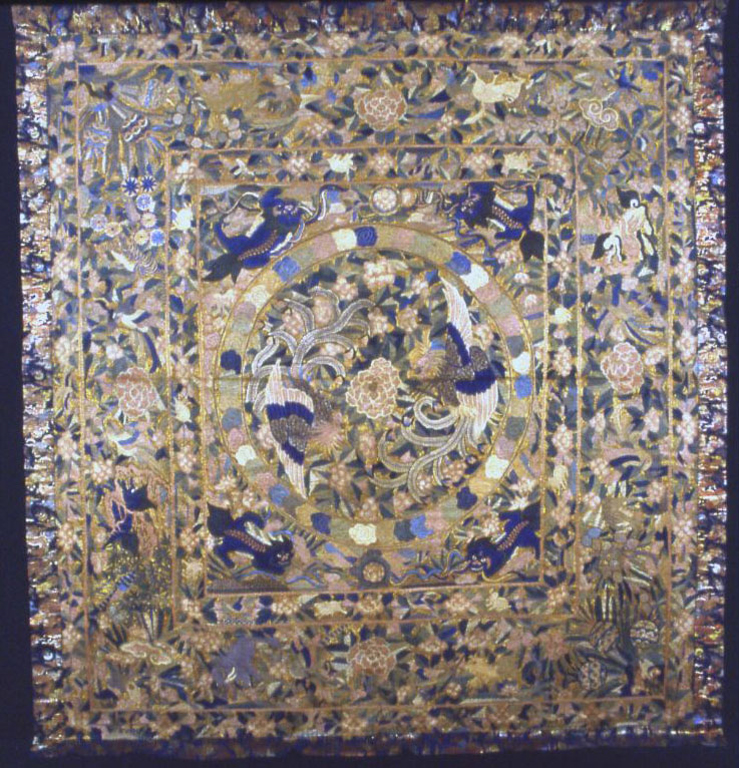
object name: Textile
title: Hanging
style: late edo, meiji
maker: Japan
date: late Edo period (1789–1868)/Meiji period (1868–1912), 1825/1900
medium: Cotton, plain weave; covered with paper; embroidered with silk, cotton and wild silk, in bullion, satin, single satin, and stem stitches; Chinese knot, laid work and couching; edged with silk and gold-leaf-over-lacquered-paper strip, warp-float faced 4:1 'z' twill interlacings of secondary binding warps and supplementary patterning wefts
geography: Japan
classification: textile; needlework (visual works)